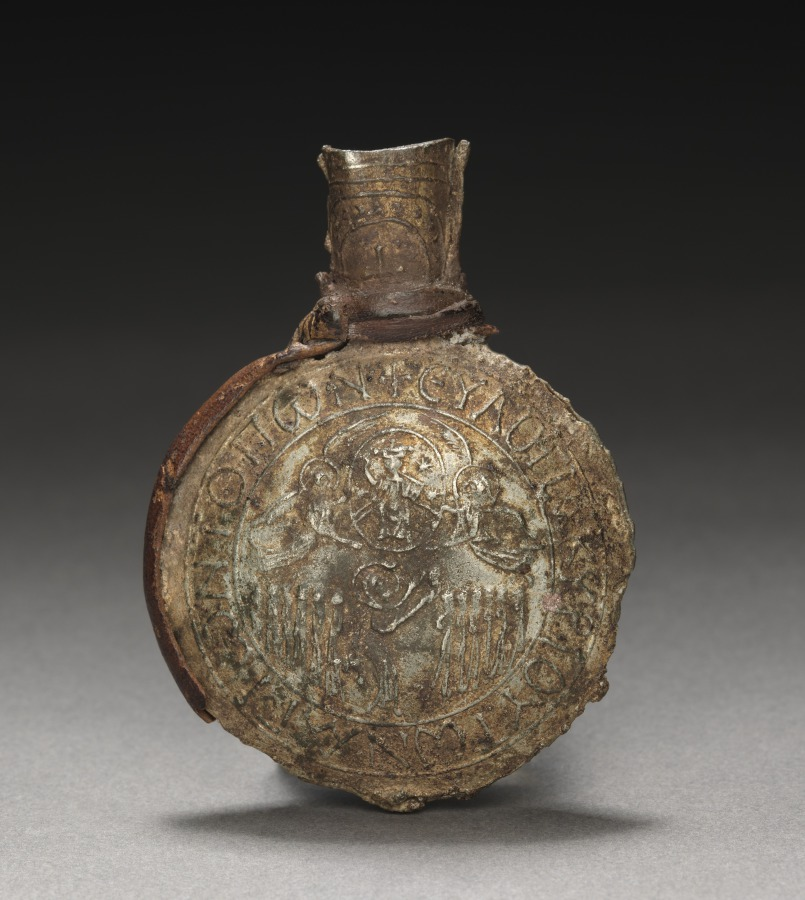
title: Pilgrim's Ampulla with the Ascension (back)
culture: Byzantium; Palestine, early Byzantine period, early 7th Century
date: c. 600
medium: tin-lead alloy with leather fragments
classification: Metalwork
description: The images found on the sides of surviving lead pilgrims' ampullae include scenes relating to the life of Christ, and by extension to the holy sites (loca sancta) where the events took place. Cast into the sides of this ampulla are scenes of Christ's Crucifixion on the front and the Ascension on the back. The use of such sacred images on these vessels illustrates the early Christian belief that images were carriers of divine power. This ampulla is known as a "Monza" or "Bobbio" type after caches of similar examples discovered in those two Italian towns.